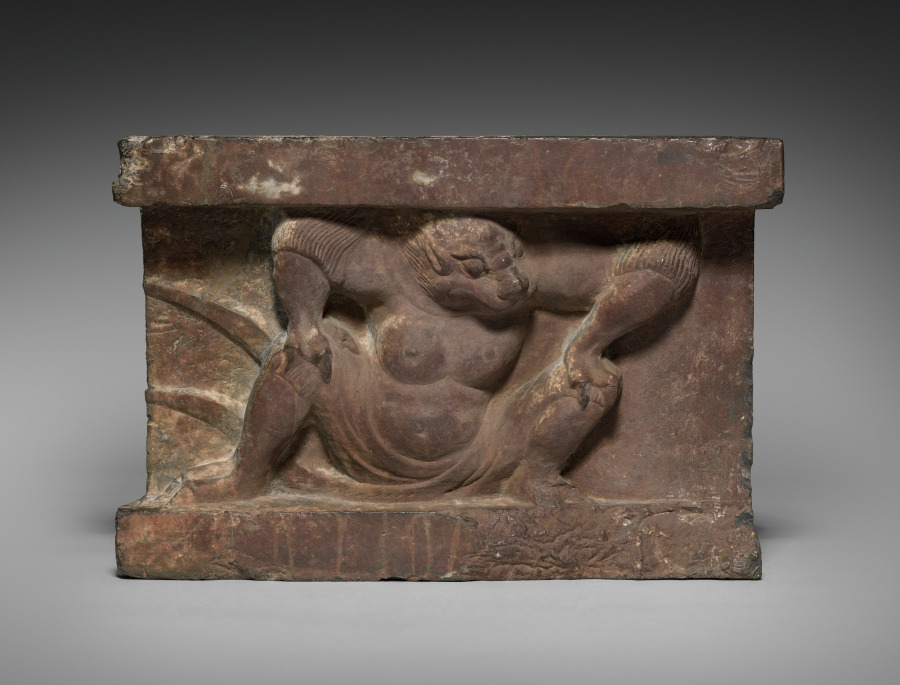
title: Monster Caryatid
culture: China, possibly from Xiangtangshan, Northern Qi dynasty (550–577)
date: late 500s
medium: Limestone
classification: Sculpture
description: This squatting monster with claws on its knees, braces its shoulders against an overhanging molding. The half-human, half-animal creature was likely part of a Buddhist cave-temple complex at Xiangtangshan, in Hebei Province, northwest China. Found in the lower registers of stone monuments of either architectural structures or statues of Buddhist deities, such monsters had a supportive function. Their scary appearance was believed to keep evil spirits away from the sacred sites.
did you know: The complex of Buddhist cave temples at Xiangtangshan, “Mountain of Echoing Halls,” is a central achievement of the Northern Qi period.